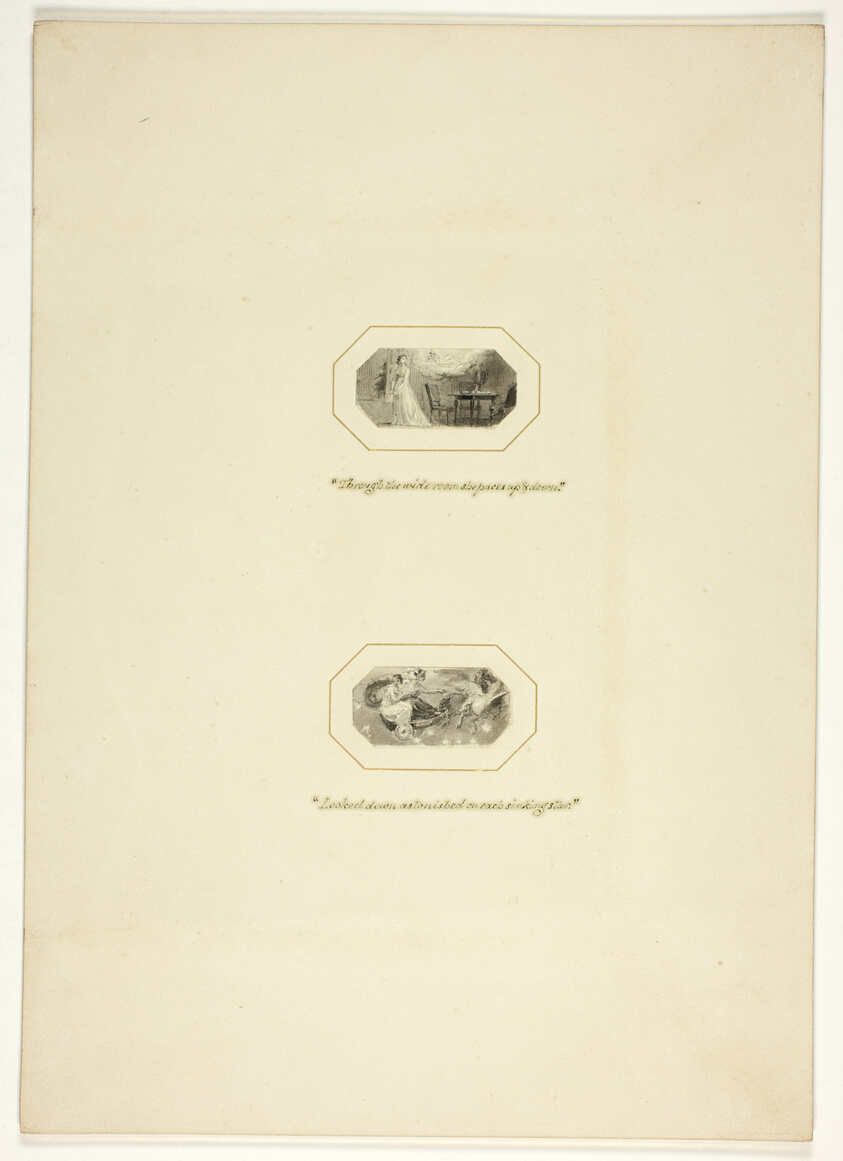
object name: Drawing and Watercolor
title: Study for a plate from The Triumphs of Temper, in the 1796 Royal Engagements Pocket Book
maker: Thomas Stothard (English, 1755-1834)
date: c. 1795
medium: Ink wash on paper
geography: England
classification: ink or chalk wash; drawings (visual works); prints and drawing